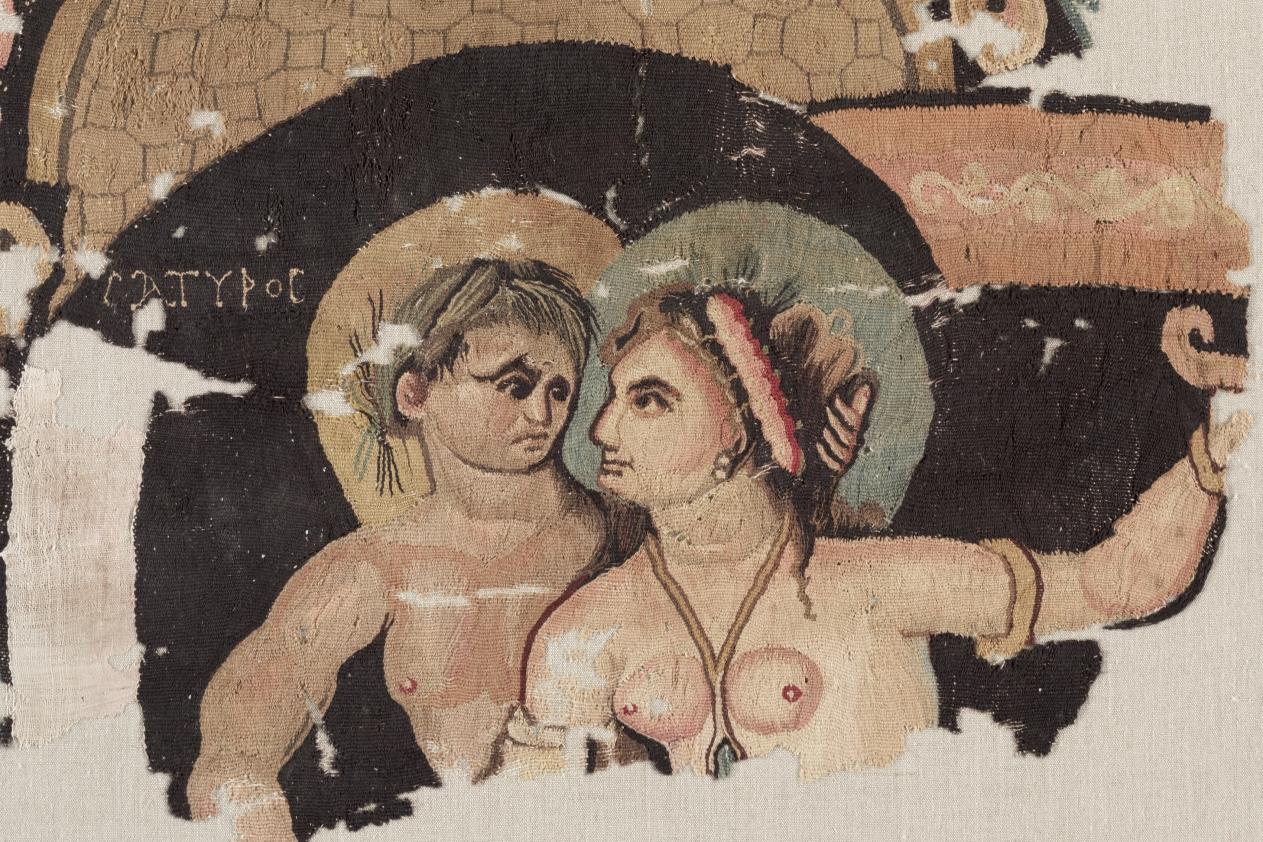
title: Fragment with Satyr and Maenad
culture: Byzantine Empire (Egypt)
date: 300s CE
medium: Linen: undyed; wool: dyed; plain weave ground with tapestry weave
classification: Textile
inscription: the satyr is identified by an inscription above his head.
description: This textile fragment depicts followers of Dionysus, the ancient Greco-Roman god of wine and merriment. A maenad, or female follower, prances in front of columns and archways, nude except for her opulent gold jewelry and pink veil. She gazes at the man, who wears a hair wreath and spotted leopard skin. A Greek inscription beside his halo confirms his identity as a satyr (a male follower). The weaver skillfully blended colors and fibers to produce the illusion of shadows and movement in the two bodies. Though Christianity was the official religion, many pagan motifs endured as creative references.